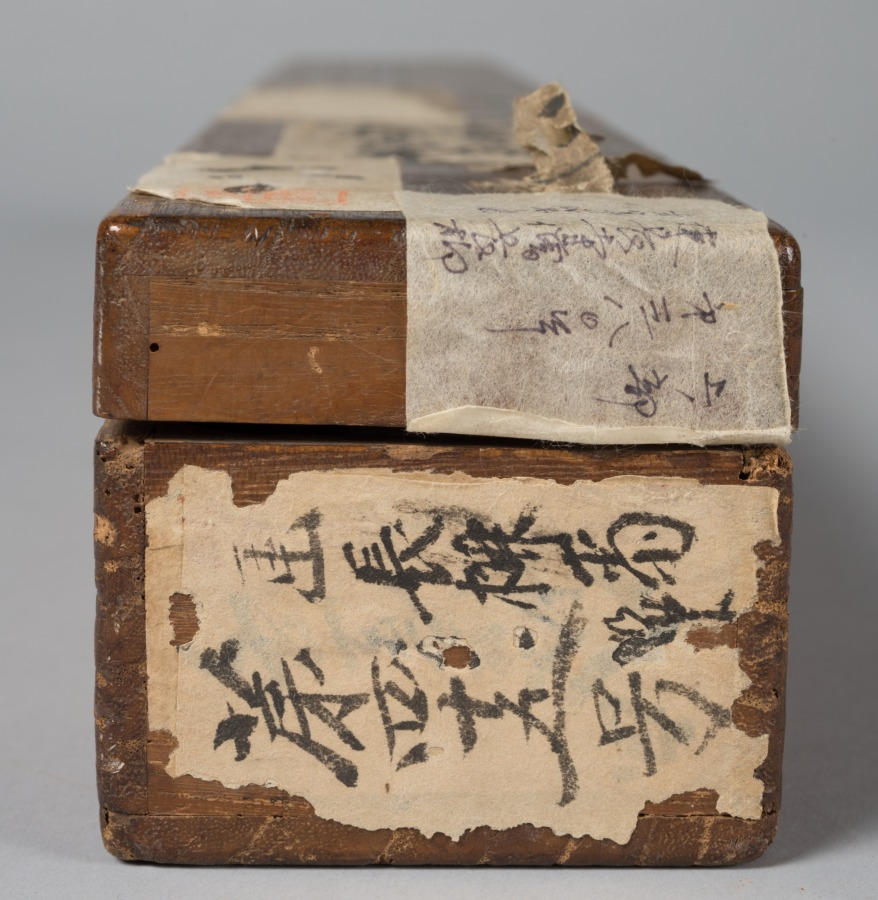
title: Emperor Minghuang Teaching Yang Gueifei to Play the Flute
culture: Japan, Muromachi period (1392–1573)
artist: Choryusai (Japanese)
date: late 1400s–early 1500s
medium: hanging scroll; ink and color on paper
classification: Painting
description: Minghuang, a prominent emperor of Tang (618-906) China and his consort, Yang Gueifei, have inspired many legends, paintings, and poetry in later Chinese culture. Through the study of Chinese literature and the collecting of Chinese paintings, tales of their lives and romance became well-known in Muromachi Japan.